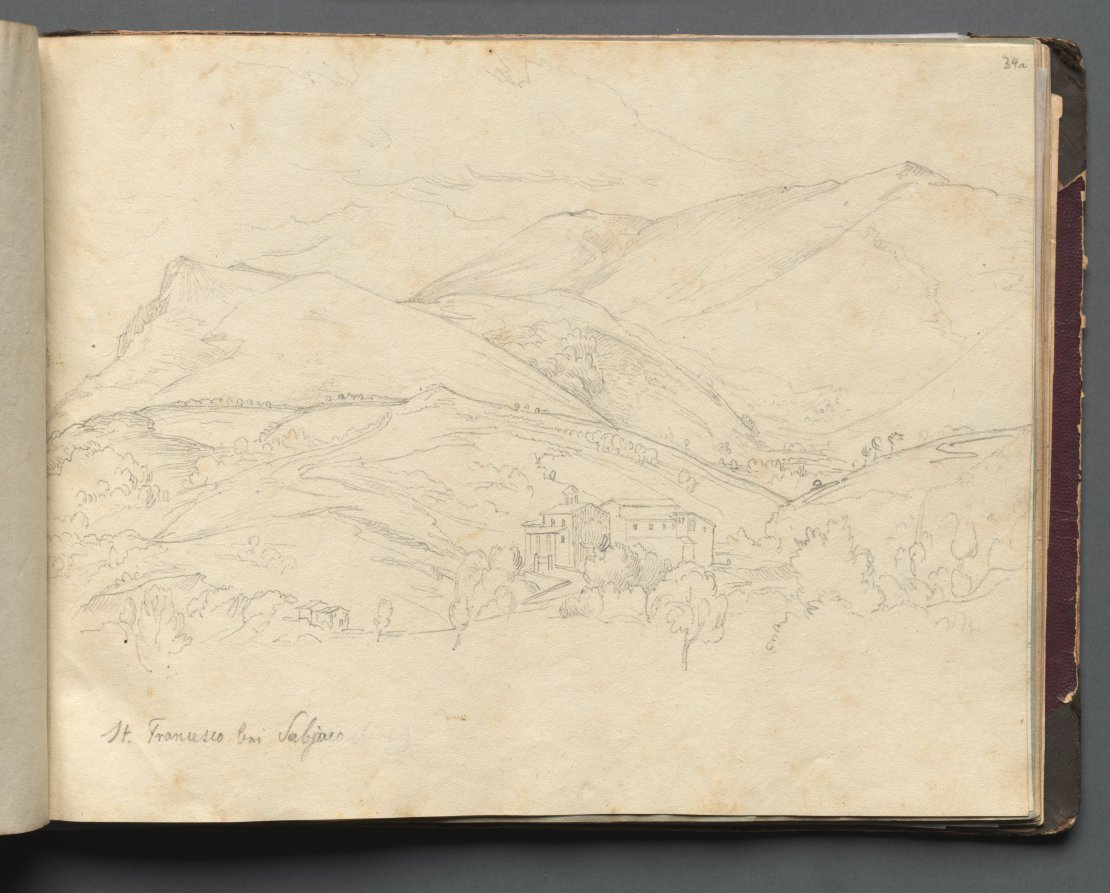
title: Album with Views of Rome and Surroundings, Landscape Studies, page 34a: "St. Francesco"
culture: Germany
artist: Franz Johann Heinrich Nadorp (German, 1794–1876)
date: c. 1830s-70s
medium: graphite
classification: Bound Volume